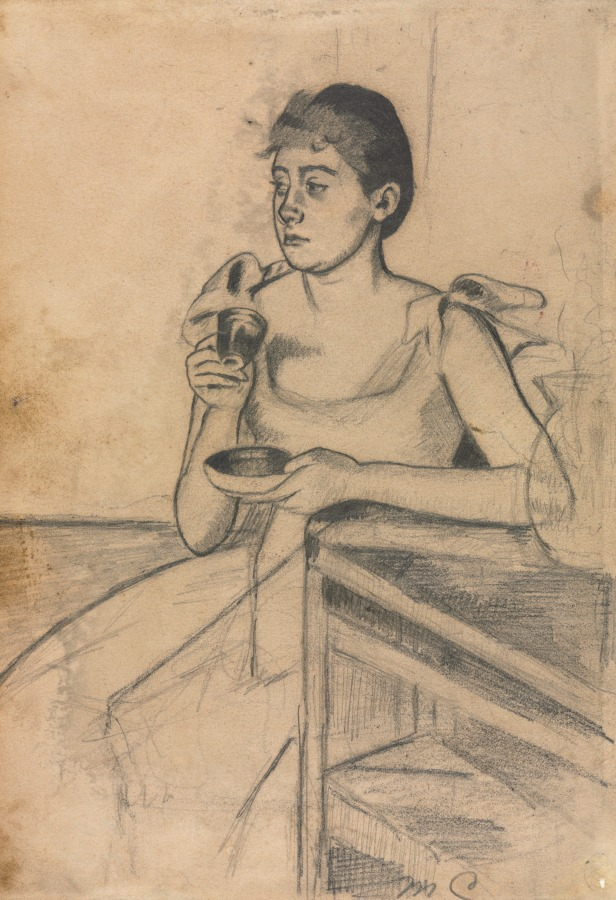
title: After-Dinner Coffee (recto)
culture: America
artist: Mary Cassatt (American, 1844–1926)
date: c. 1889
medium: graphite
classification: Drawing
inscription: inscribed in grahite, lower right: "M. C."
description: Cassatt exhibited prints for the first time in 1880 at the fifth Impressionist exhibition. As the decade progressed, she continued to show her graphic work alongside pastels and paintings. In the spring of 1890, at the Deuxième Exposition de Peintres-Graveurs, she showed a group of drypoints, remarkable in their delicacy and precision, as well as a group of prints made with a combination of aquatint and softground etching that appeared quickly drawn and spontaneous. After-Dinner Coffee is a study for a softground etching with aquatint.